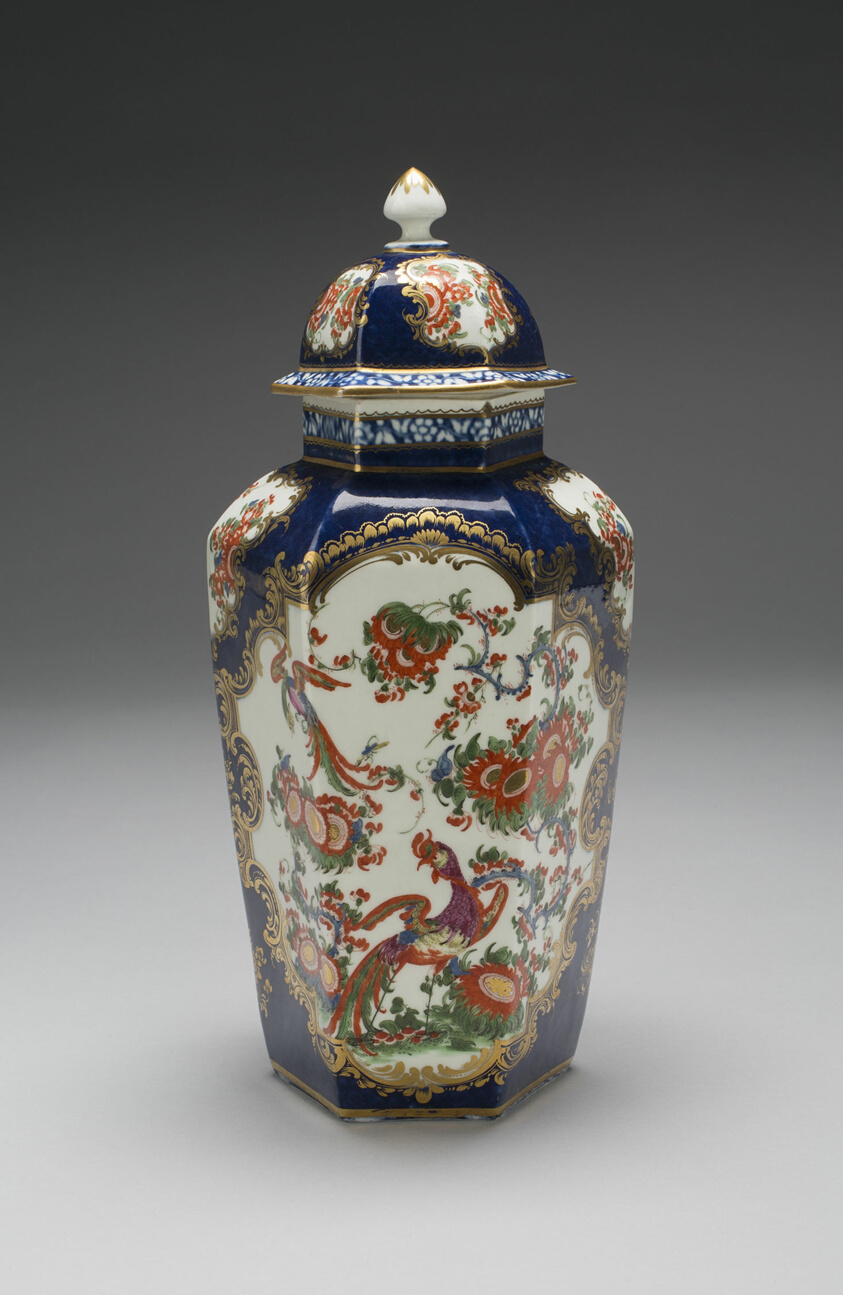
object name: Ceramics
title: Vase with Cover (one of a pair)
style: Rococo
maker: Worcester Porcelain Factory (Warmstry House Period, 1751–1783); Worcester, England, founded 1751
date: c. 1770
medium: Soft-paste porcelain with blue scale ground and gilding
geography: Worcester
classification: vase; vessel; tableware; ceramics; porcelain; european decorative arts